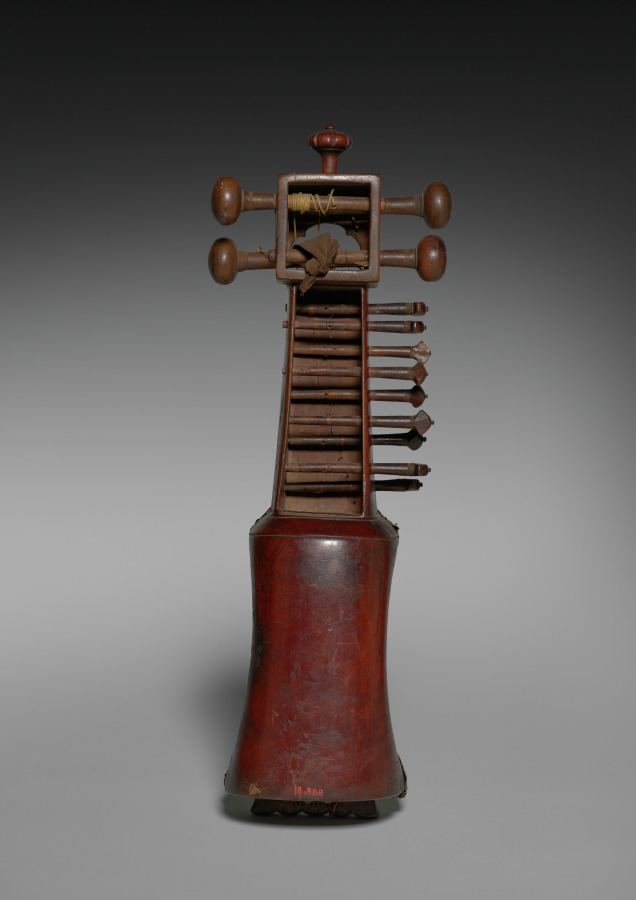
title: Sarangi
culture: East India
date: c. 1850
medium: Wood, parchment, bone or ivory, gut, and copper strings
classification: Musical Instrument